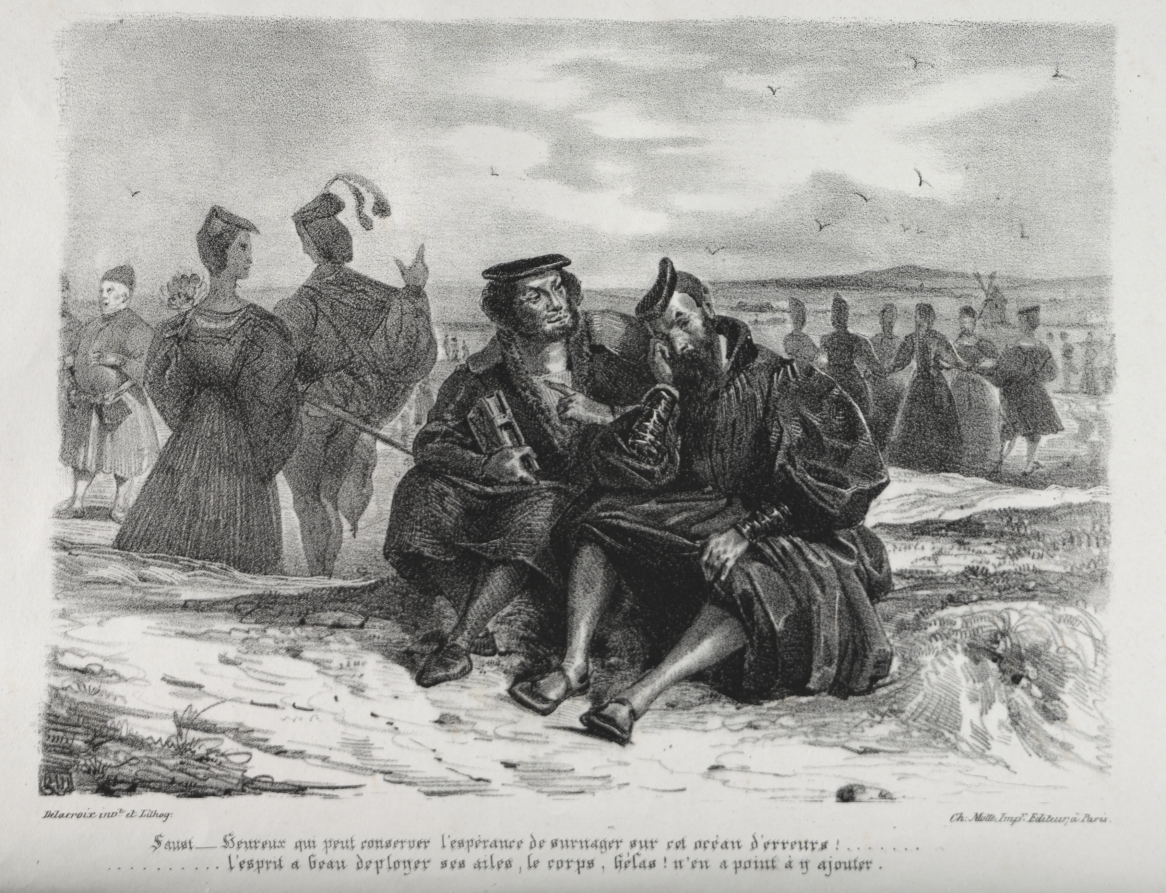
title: Illustrations for Faust: Faust and Wagner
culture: France, 19th century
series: Faust: Tragédie de M. de Goethe, translated into French by Albert Stapfer.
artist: Eugène Delacroix (French, 1798–1863)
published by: Chez Ch. Motte, Éditeur, distributed by Chez Sautelet, Libraire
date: 1828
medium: lithograph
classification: Print